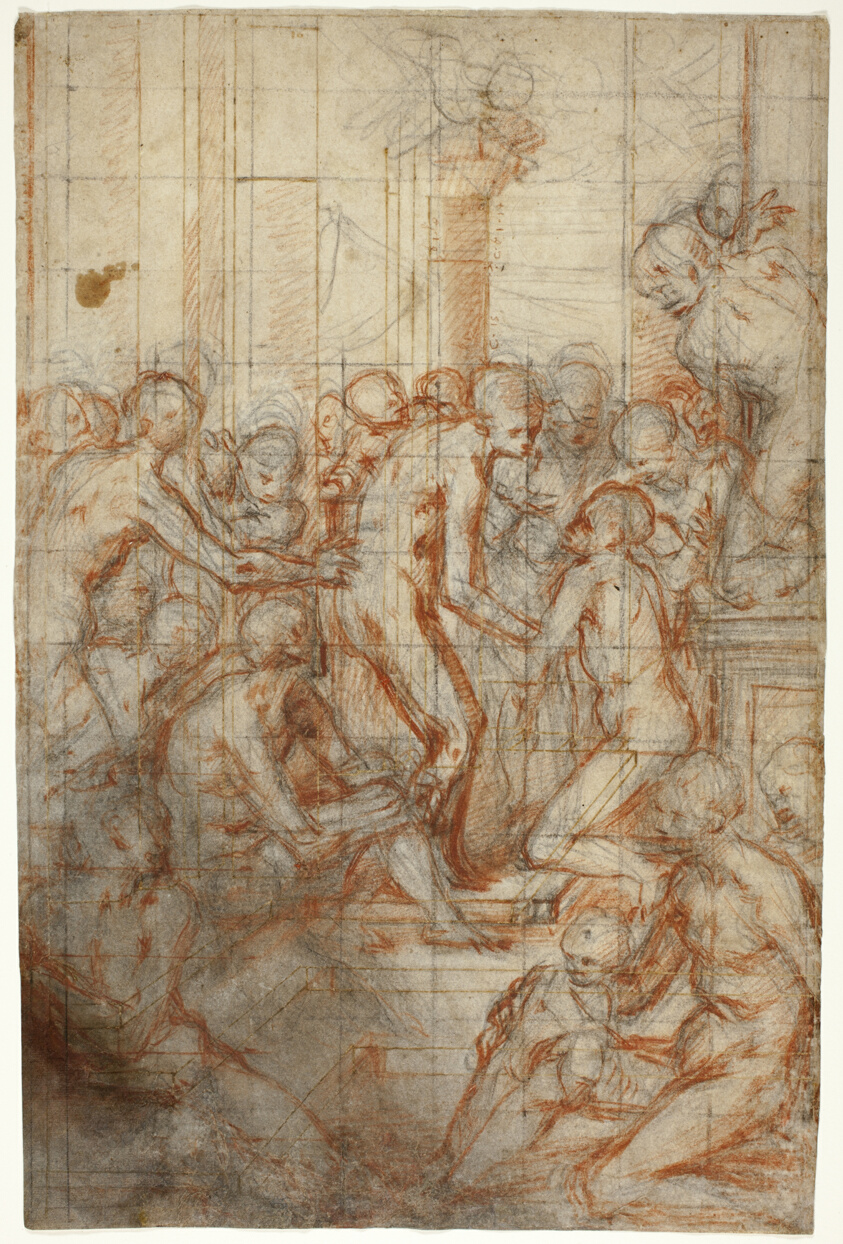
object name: Drawing and Watercolor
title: Study for the Purification of the Virgin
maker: Giovanni Battista Naldini (Italian, 1537-1591)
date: c. 1577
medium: Red and black chalk with stumping, and incising, over pen and brown ink, on ivory laid paper, squared in black chalk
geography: Italy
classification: chalk; drawings (visual works); prints and drawing